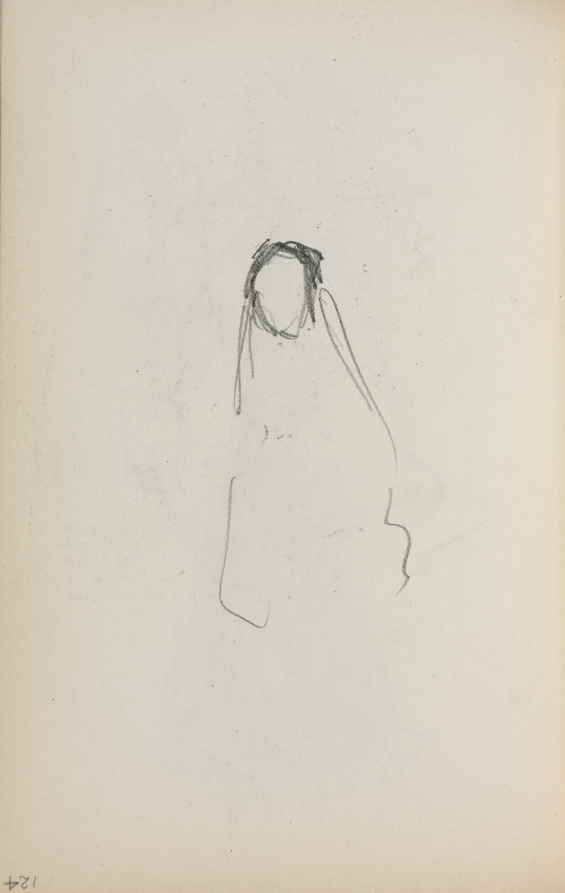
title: Italian Sketchbook: Figure (page 124)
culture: America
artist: Maurice Prendergast (American, born Newfoundland [now Canada], 1858–1924)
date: 1898–1899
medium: pencil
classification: Bound Volume